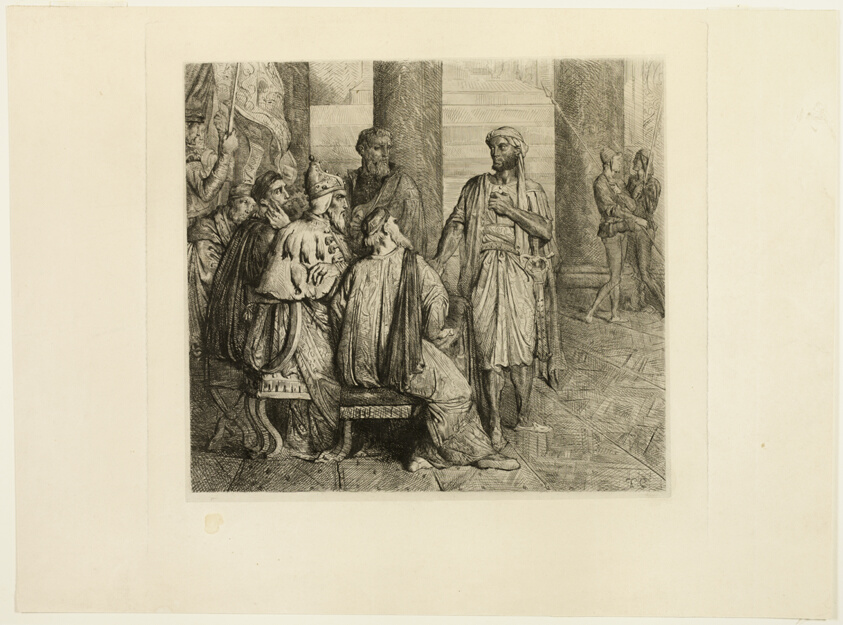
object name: Print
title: She Lov'd Me for the Dangers, plate three from Othello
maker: Théodore Chassériau (French, 1819-1856)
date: 1844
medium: Etching, engraving, roulette and drypoint on ivory China paper, laid down on ivory wove paper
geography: France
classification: etching; print; prints and drawing